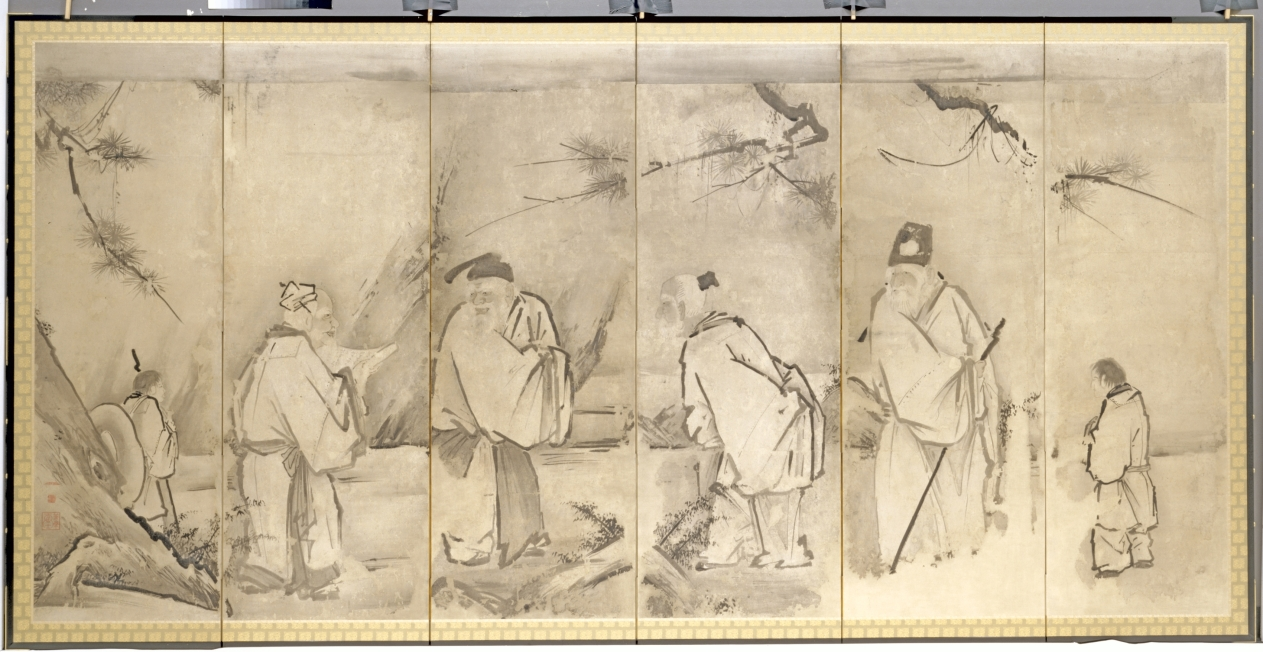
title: Four Elders of Mt. Shang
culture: Japan, Edo period (1615–1868)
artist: Kano Tan’yū (Japanese, 1602–1674)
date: 1600s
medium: pair of six-fold screens; ink on paper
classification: Painting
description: The Kano school was a group of professional artists patronized by the shogun from the late Muromachi period to the Edo period. The group adopted themes of reclusiveness to convey the importance of loyalty to the shogunate. A leader of the Edo Kano school, Kano Tanyu paired Seven Sages of the Bamboo Grove and Four Elders of Mt. Shang to reference a painting of the same theme attributed to Kano Motonobu. Seven Sages of the Bamboo Grove refers to the elites who escaped the social chaos of China’s Wei-Jin period (AD 200s–400s); they fled to a secluded bamboo grove where they could express themselves freely, enjoying pure conversation, music, and wine. The other screen, Four Elders of Mt. Shang, depicts the scholars who left the turbulence of the late Qin dynasty to pursue their scholarly interests in seclusion on Mt. Shang in Shanxi province.